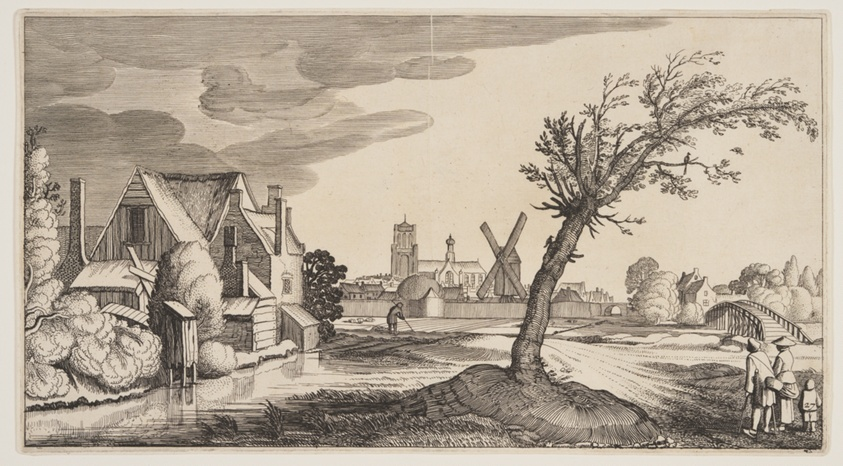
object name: Print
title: House on a Pond Outside a Town, from Landscapes (Playsante Lantschappen)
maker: Attributed to Claes Jansz. Visscher II (Dutch, 1586-1652); after Jan van de Velde II (Dutch, c. 1593-1641)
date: c. 1641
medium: Etching, with engraving, on ivory laid paper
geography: Netherlands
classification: etching; paper; print; prints and drawing